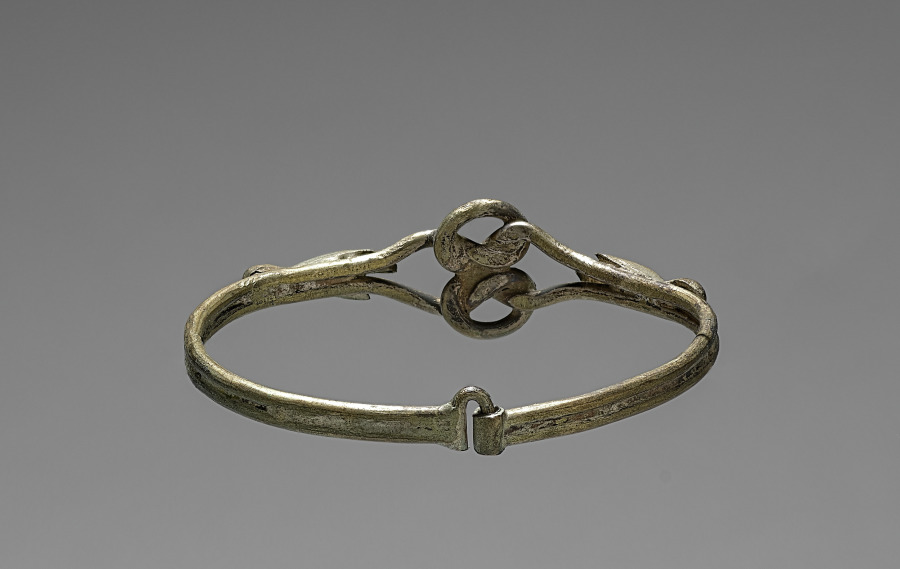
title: Wristlet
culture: Burma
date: 1800s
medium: gold and rubies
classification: Jewelry